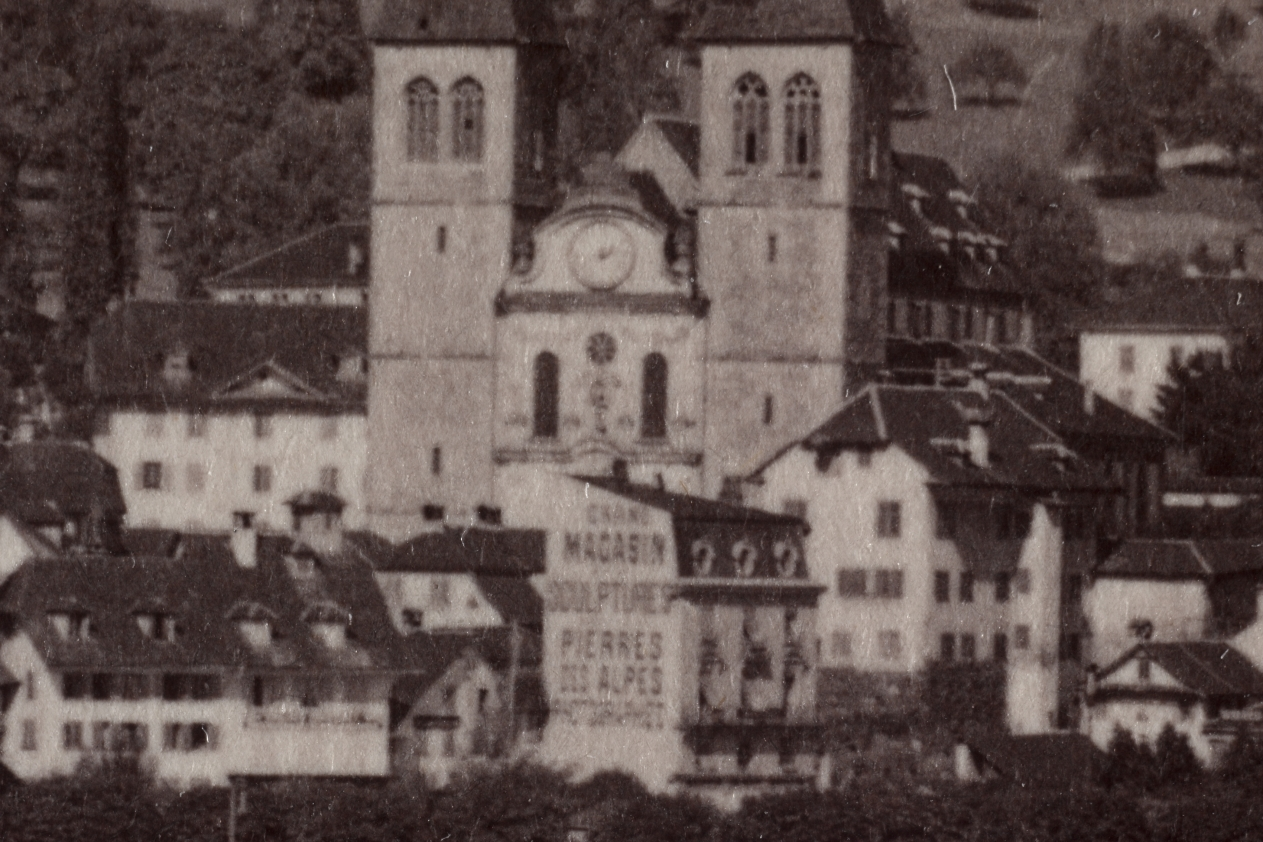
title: Untitled (Bridge with Town in Distance)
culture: 19th century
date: 1900s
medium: albumen print from wet collodion negative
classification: Photograph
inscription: written in pencil on verso: "477 (?)="